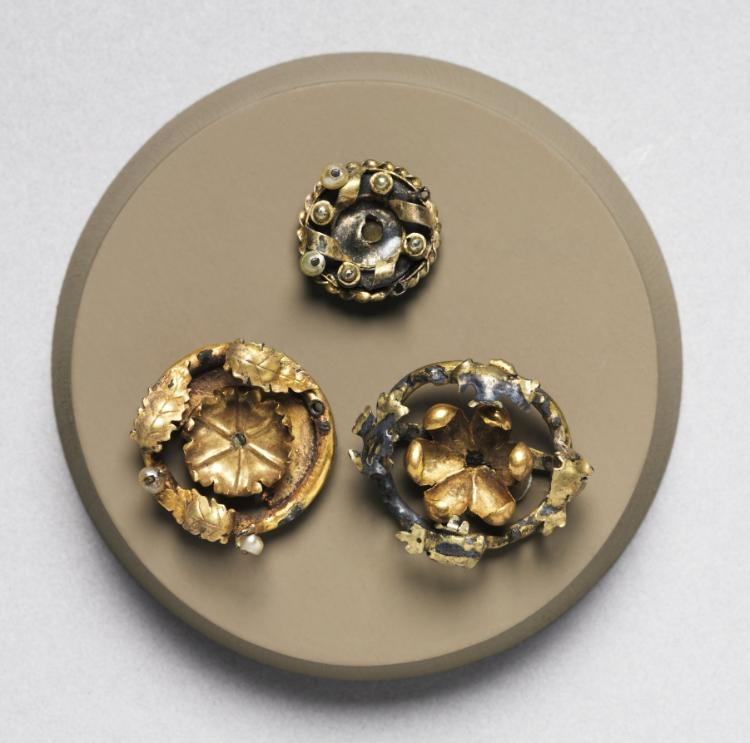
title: Brooch (Element of Garment Clasp)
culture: France, Paris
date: c. 1400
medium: gold, gilt silver and pearls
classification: Jewelry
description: During the fourteenth century, brooches such as this group of five were ordinarily worn at the neck to clasp a lady's cloak or dress. They could also be sewn into a garment or hat as applied ornament.